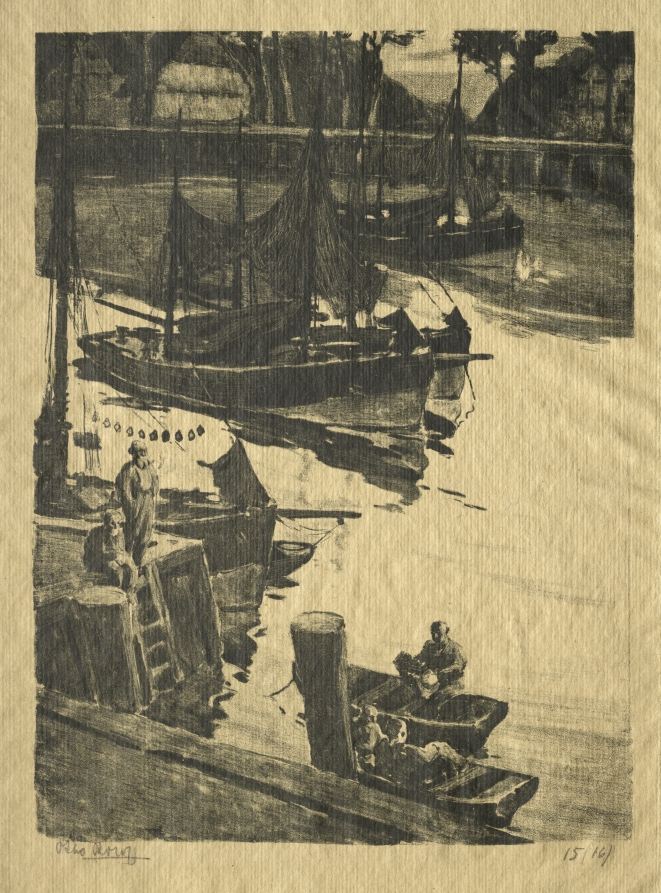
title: The Wharf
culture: Germany, 19th century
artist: Willem Roelofs (Dutch, 1822–1897)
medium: lithograph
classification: Print